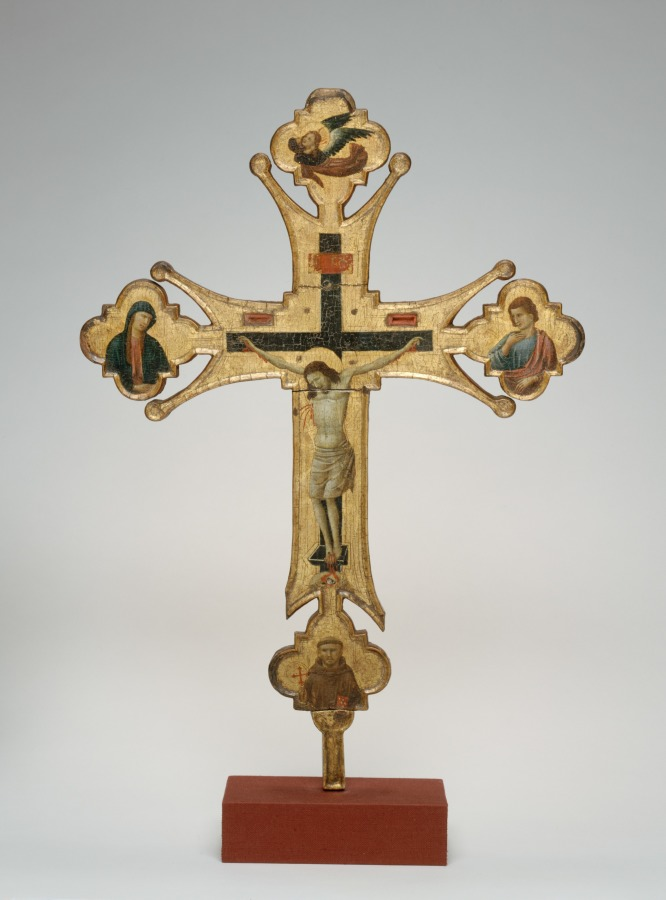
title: Processional Cross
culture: Italy, Umbria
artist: Master of Santa Chiara (Italian)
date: c. 1320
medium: oil on canvas on wood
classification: Painting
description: This cross was originally mounted on a tall pole and carried in religious processions. Therefore, the figures on each side are almost identical. In the center is Christ crucified. Looking on from the elaborate terminals at left and right are the Virgin and Saint John. The bottom terminal shows a different saint on each side: Saint Francis on one and Saint Clare on the other. At the top of each side is an angel. Although one angel looks up and the other down, both express intense grief in their faces and gestures. The Master of Santa Chiara is the name given to this unknown artist who painted this and several other works in Assisi. In that city, Saint Francis founded an order of friars while Saint Clare established a counterpart for women called the Poor Clares. The presence of both saints on this cross suggests that it was made for one of Assisi's Franciscian institutions.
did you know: This cross is painted on both sides so that while being carried in a procession the images are visible to a crowd; both sides are not quite identical.